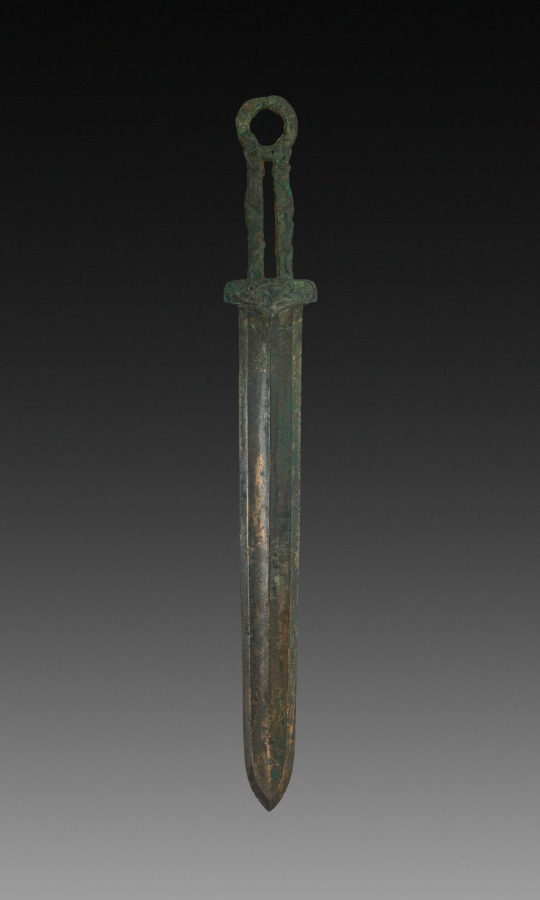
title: Sword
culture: China, Han dynasty (202 BCE–220 CE)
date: 206 BCE–220 CE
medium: bronze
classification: Arms and Armor